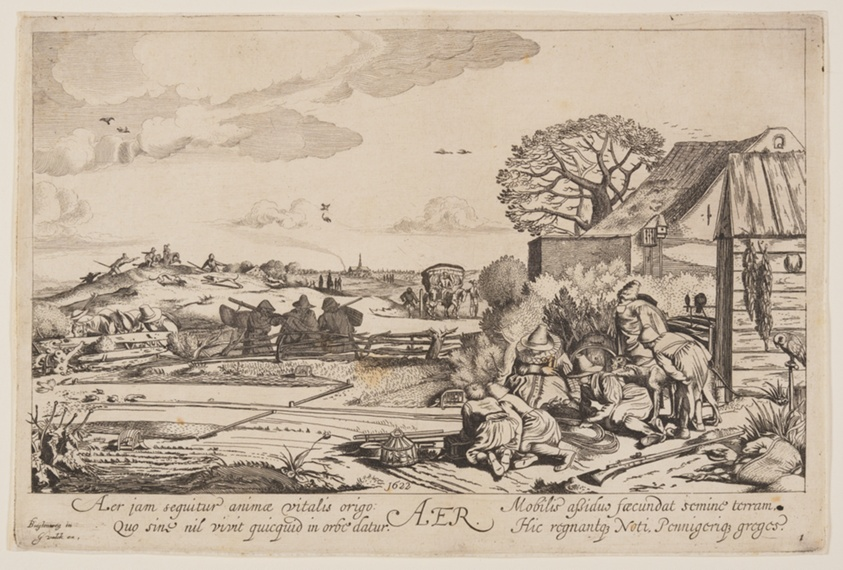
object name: Print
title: Air (with a view of Haarlem), from The Four Elements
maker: Jan van de Velde II (Dutch, c. 1593–1641); after Willem Buytewech (Dutch, 1591/92-1624)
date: 1622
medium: Etching on ivory laid paper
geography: Netherlands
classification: print; paper; prints and drawing; etching